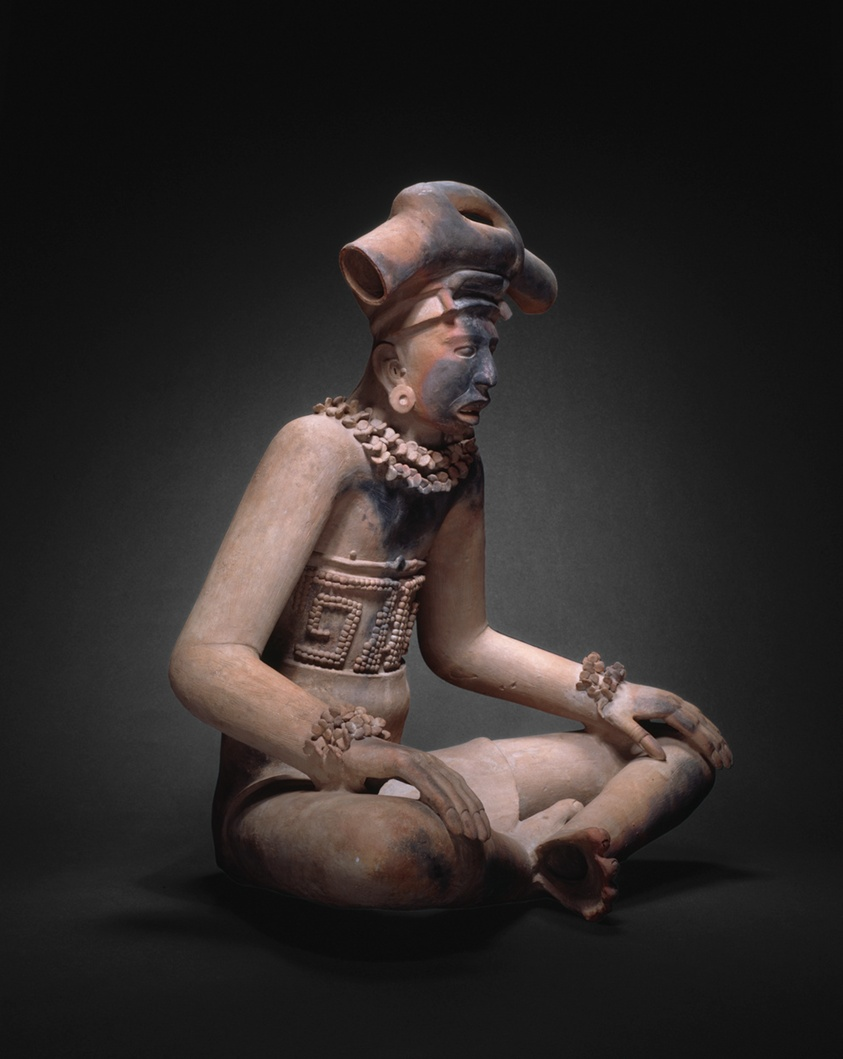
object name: Sculpture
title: Figure of a Seated Leader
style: totonac, early classic, classic, mesoamerican, Pre-Columbian, americas, remojadas, classic veracruz, Arts of the Americas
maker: Totonac, Remojadas; Veracruz, south-central Gulf Coast, Mexico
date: 300–600 CE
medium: Terracotta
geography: Remojadas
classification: ceramics; earthenware; sculpture; art of the americas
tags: people, textile pattern, costume, headdresses, rulership, rulers (people)